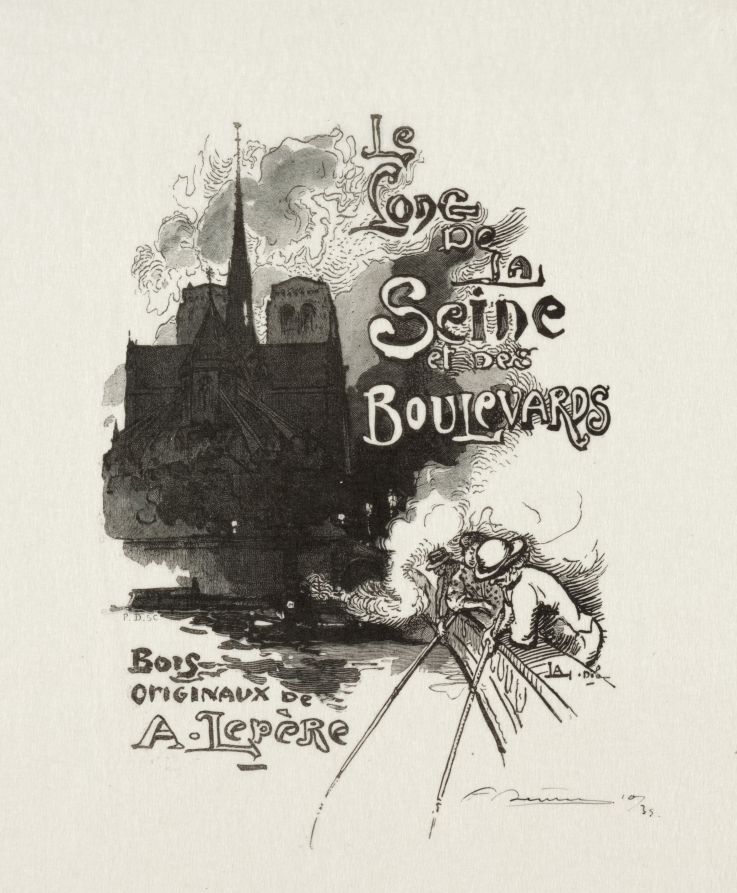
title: Frontispiece: Le long de la Seine et des Boulevards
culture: France, 19th-20th century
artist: Auguste Louis Lepère (French, 1849–1918)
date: c. 1870–1918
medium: wood engraving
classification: Print